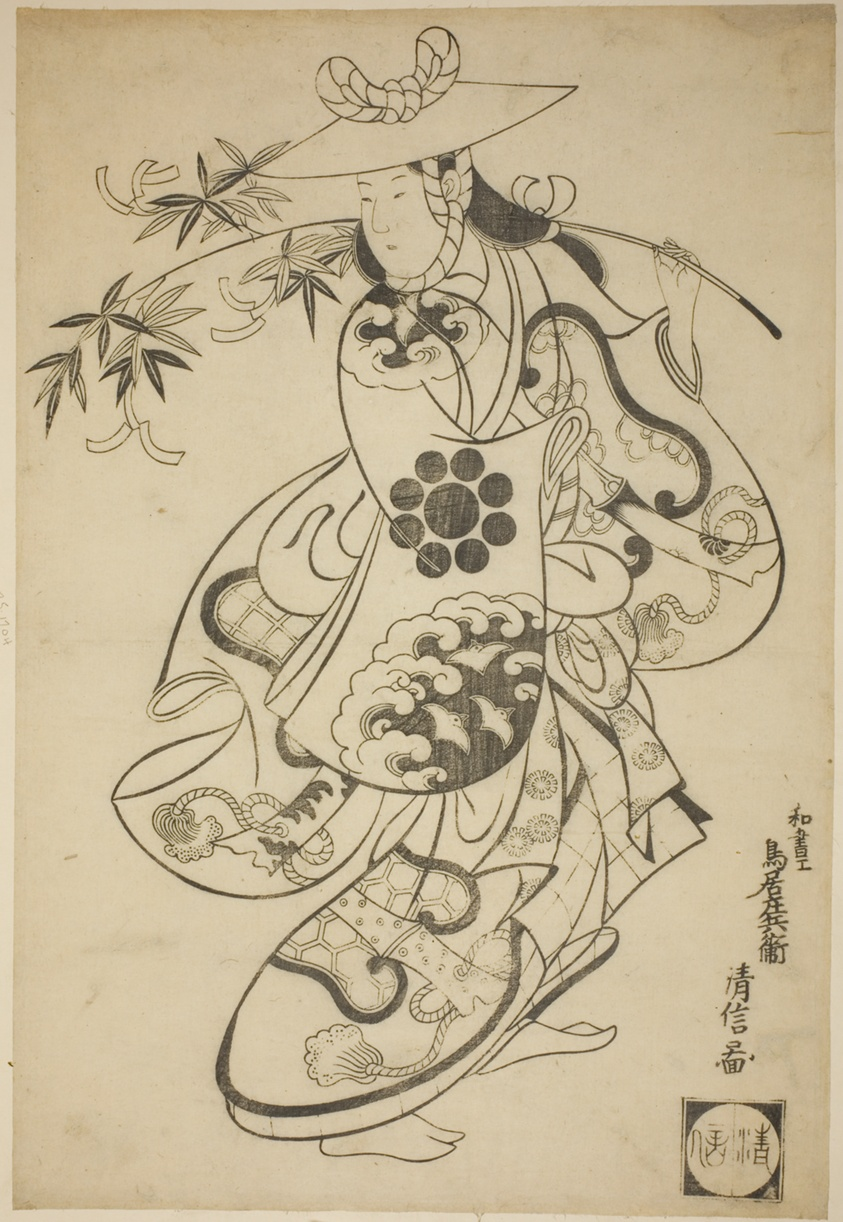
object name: Print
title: Tanabata Dance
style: Japanese (culture or style)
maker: Torii Kiyonobu I (Japanese, 1664-1729)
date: Woodblock carved 1698, printed about 1915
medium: Woodblock print; sumizuri-e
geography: Japan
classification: woodblock print; print; asian art; woodblock